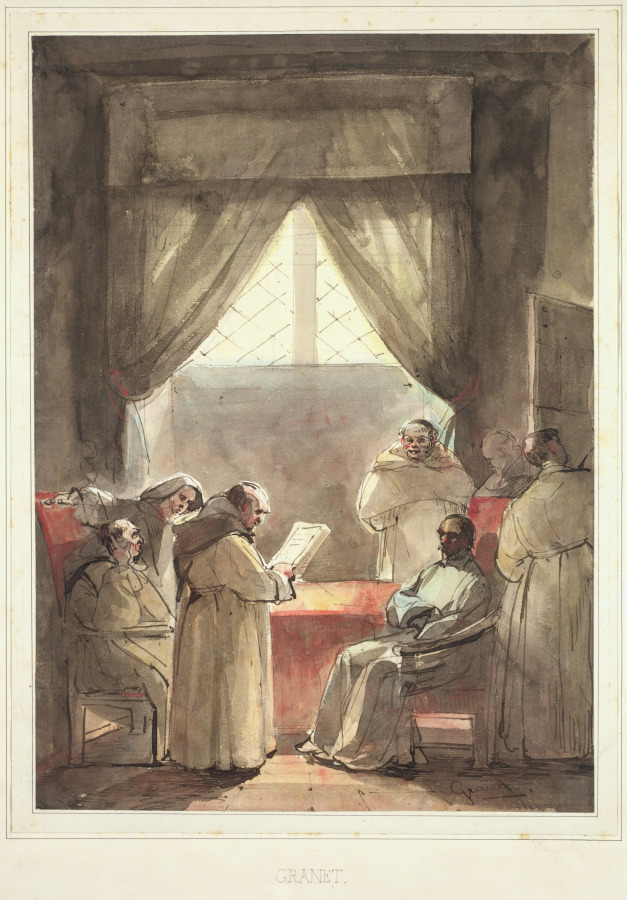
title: The Monks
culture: France, 18th-19th century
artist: François Marius Granet (French, 1775–1849)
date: c. 1802–30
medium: watercolor, pen and brown ink on laid paper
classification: Drawing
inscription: Watermark: BLAUW and five-pointed star on primary support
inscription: on mount, at center, in black ink: “GRANET.”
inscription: in black ink, at lower right: “Granet”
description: The French artist François Granet traveled to Rome in 1802, where he became fascinated by the lives of monks and priests, and the cloistered interiors where they lived and worked. For most of his career, these figures and settings remained the primary subject of his work. This drawing shows one such group in the midst of private study and contemplation.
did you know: In addition to working as an artist, Granet served as curator of the Musée du Louvre beginning in 1824.